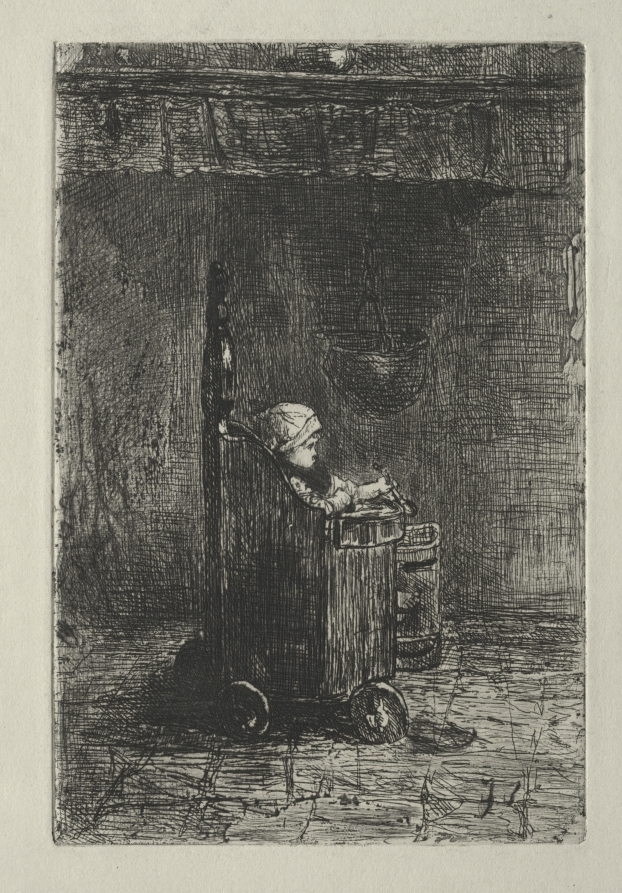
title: Baby in His Chair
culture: Netherlands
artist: Jozef Israëls (Dutch, 1824–1911)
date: 1875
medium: etching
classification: Print